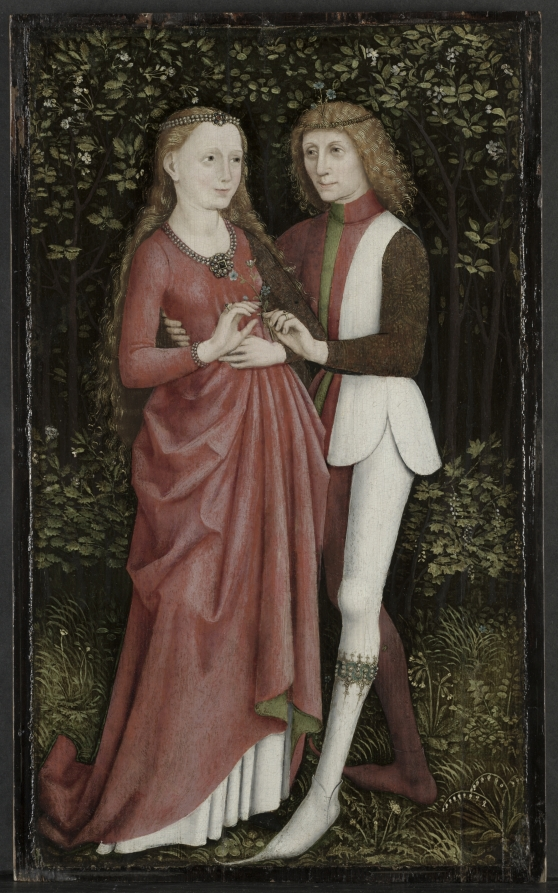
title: A Bridal Couple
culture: Southern Germany, 15th century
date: c. 1470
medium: oil on panel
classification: Painting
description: This painting depicting a recently married aristocratic couple is filled with symbolism. The various floral elements represent love and fertility, while the colors of their clothes suggest not only their relationship but also chastity, love, and modesty. What details might you choose to symbolize a young couple in love?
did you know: This painting inspired internationally renowned Finnish composer Kaija Saariaho to write a piece of music titled "Orion" after she visited the museum.